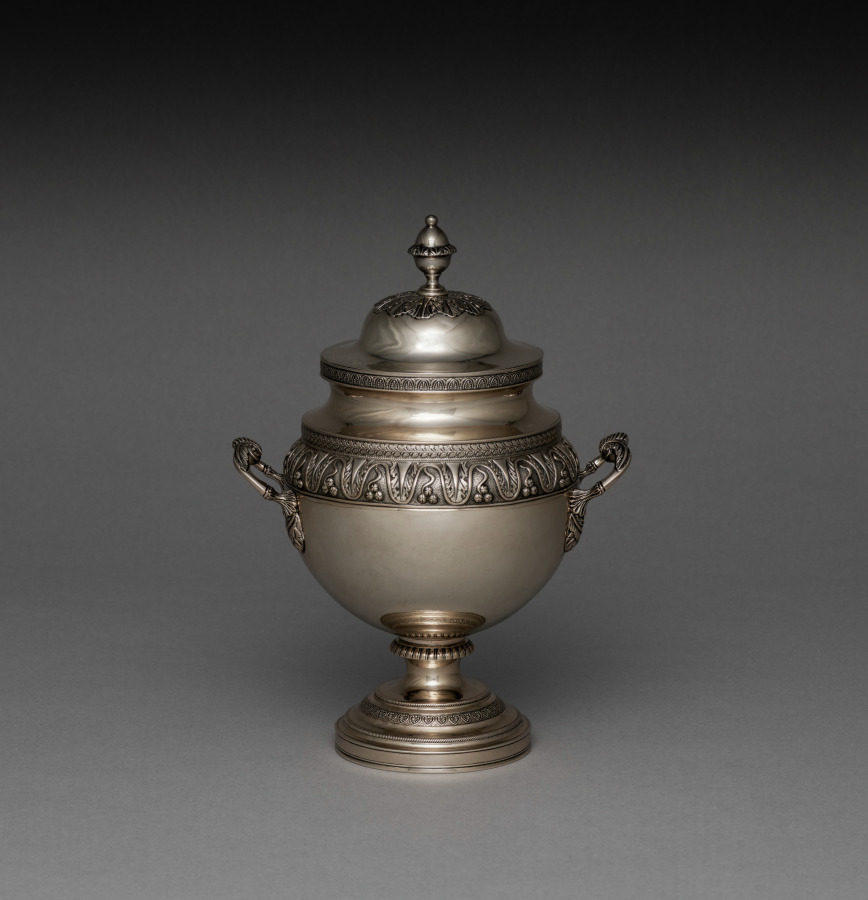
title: Sugar Urn with Cover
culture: America, Pennsylvania, Philadelphia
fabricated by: Harvey Lewis (American, 1835)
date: c. 1811–25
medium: silver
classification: Silver